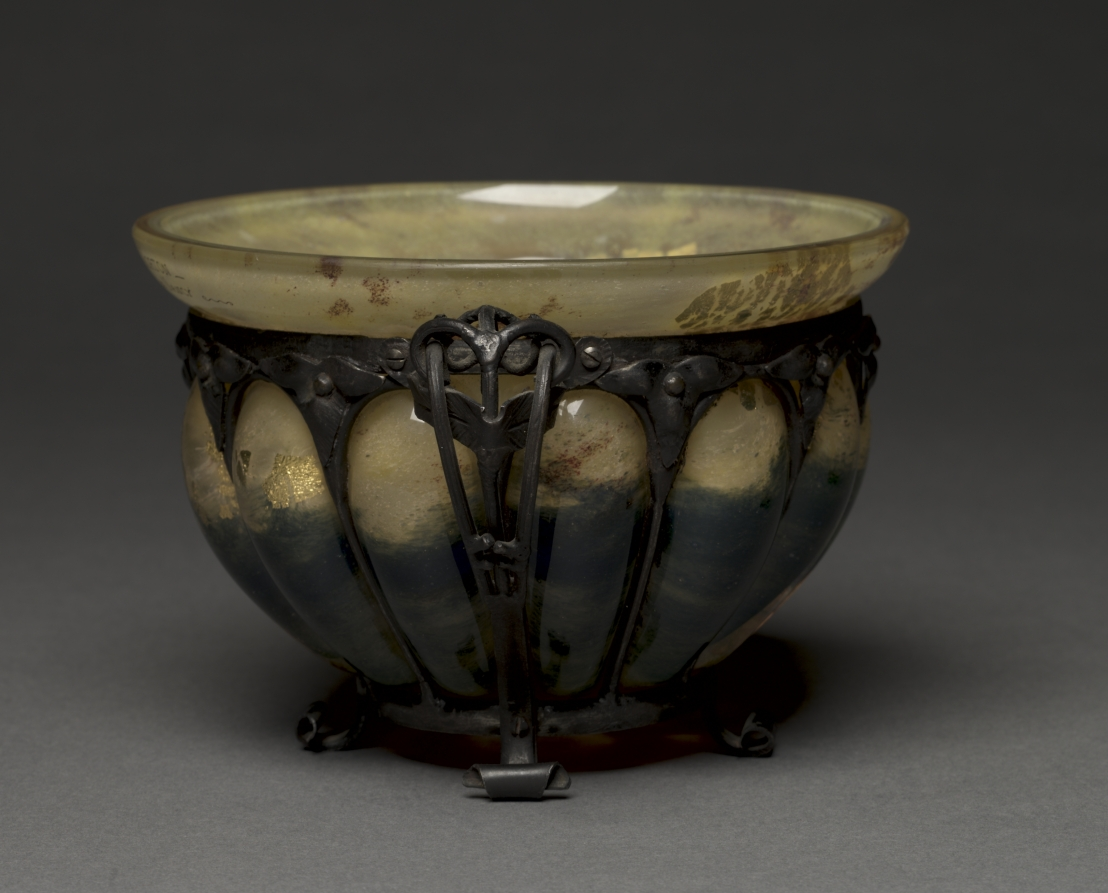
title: Bowl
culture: France, Nancy, 20th century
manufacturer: Daum Brothers (French)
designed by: Louis Majorelle (French, 1859–1926)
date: 1900–1925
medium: glass blown into bronze cage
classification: Glass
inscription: signed on bottom: "Daum/Nancy/ [symbol] / L.Majorelle." Inscribed on rim: "Captain Lawrence Norton/l'Ecole de la Metallurgie de Nancy/1921."